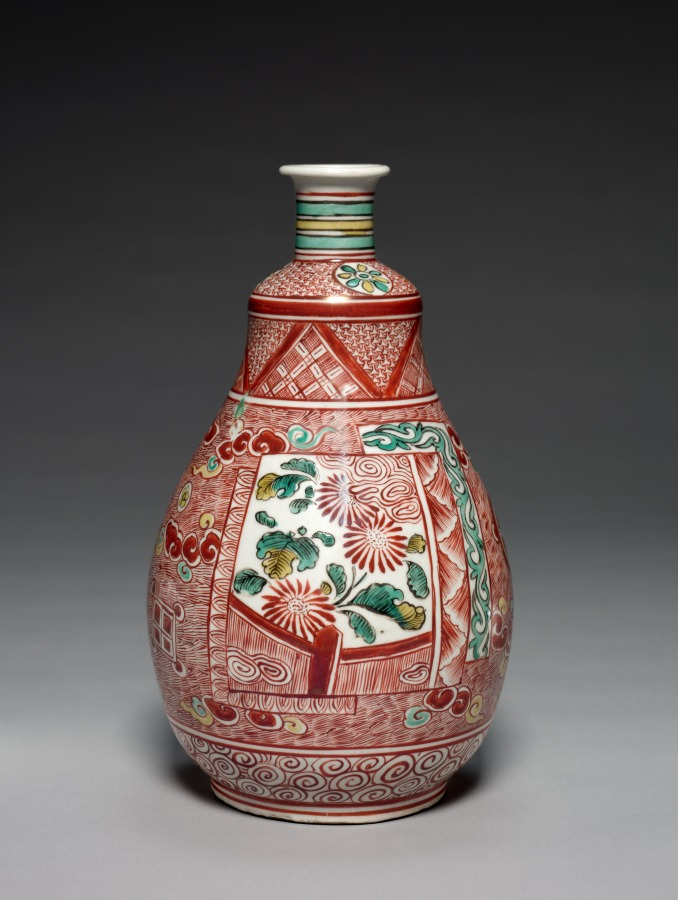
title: Tea Whisk-Shaped Sake Bottle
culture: Japan, Edo period (1615–1868)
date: 1660s–early 1670s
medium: Porcelain with overglaze enamel (Hizen ware, early iro-e)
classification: Ceramic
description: This sake bottle resembles a whisk used in preparing powdered green tea, with the handle at the top and the body of the brush flaring out below. Its bold design is anchored by images of chrysanthemums and pomegranates set in panels against a ground of red hatching with tricolored clouds. Additional patterns of swirls, stripes, flowers, and other forms make the piece dazzling.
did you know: This bottle is for sake, or fermented rice wine, Japan's most famous variety of local alcohol.